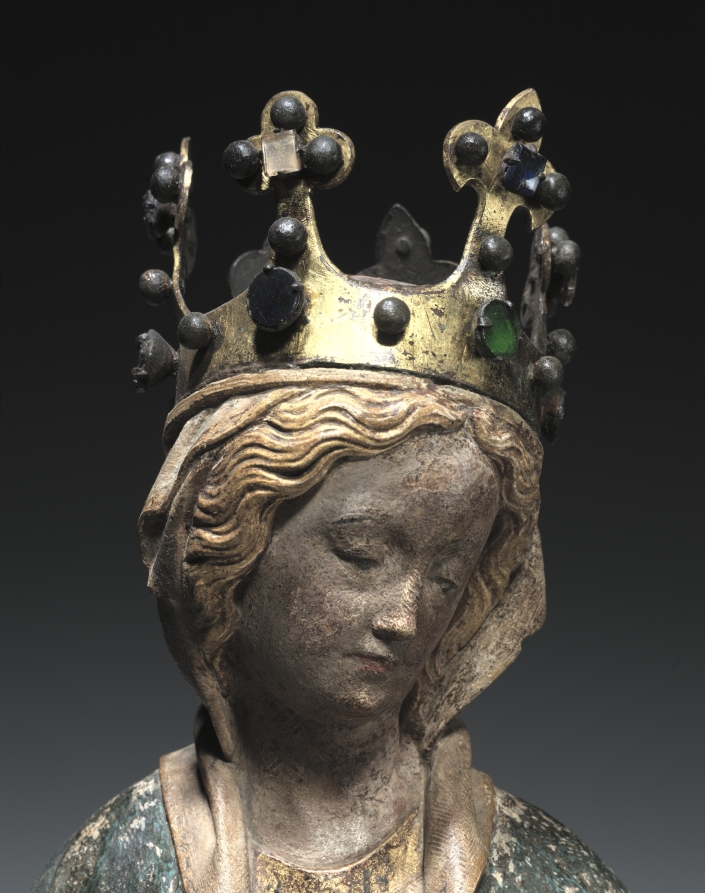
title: Enthroned Virgin with the Writing Christ Child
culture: Franco-Netherlandish, active Paris(?), 15th century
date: c. 1400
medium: limestone with polychromy and gilding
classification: Sculpture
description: This sculpture belongs to a tradition of seated Virgins that were prominent in Netherlandish art in the decades around 1400, and by extension may be associated with the Valois courts at Paris, Dijon, and Bourges. The theme of the Christ child who writes into an open book or onto a vellum banderole emerged during the third quarter of the 14th century and had great appeal among ecclesiastical and aristocratic clients. It undoubtedly refers to the educating and nurturing role of the mother in teaching the child, but also to the future position of the adult Christ as author and teacher. The small scale of this sculpture and the fact that its back is uncarved suggest that it was made for a small alcove or niche, appropriate in the intimate setting of a small chapel or oratory. The sculpture would have primarily been viewed from the front and perhaps from slightly below.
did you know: Here the Virgin is sitting on a highly decorated pillow.